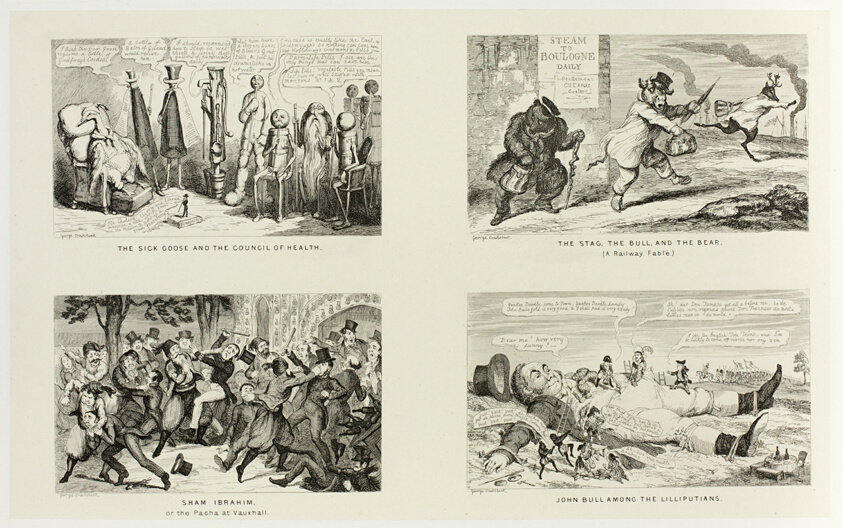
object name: Print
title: The Sick Goose and the Council of Health from George Cruikshank's Steel Etchings to The Comic Almanacks: 1835-1853 (top left)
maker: George Cruikshank (English, 1792-1878); published by Pickering & Chatto (English, 19th century)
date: 1847, printed c. 1880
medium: Four steel etchings in black on cream India paper, laid down on off-white card (chine collé)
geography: England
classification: etching; paper; print; prints and drawing